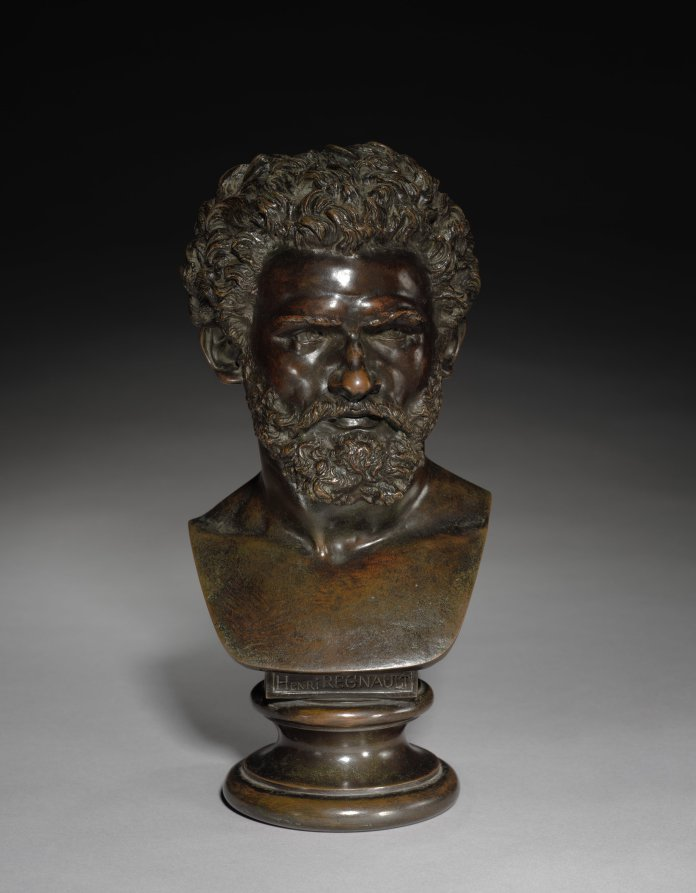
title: Henri Regnault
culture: France, 19th century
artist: Louis-Ernest Barrias (French, 1841–1905)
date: 1871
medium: bronze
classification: Sculpture